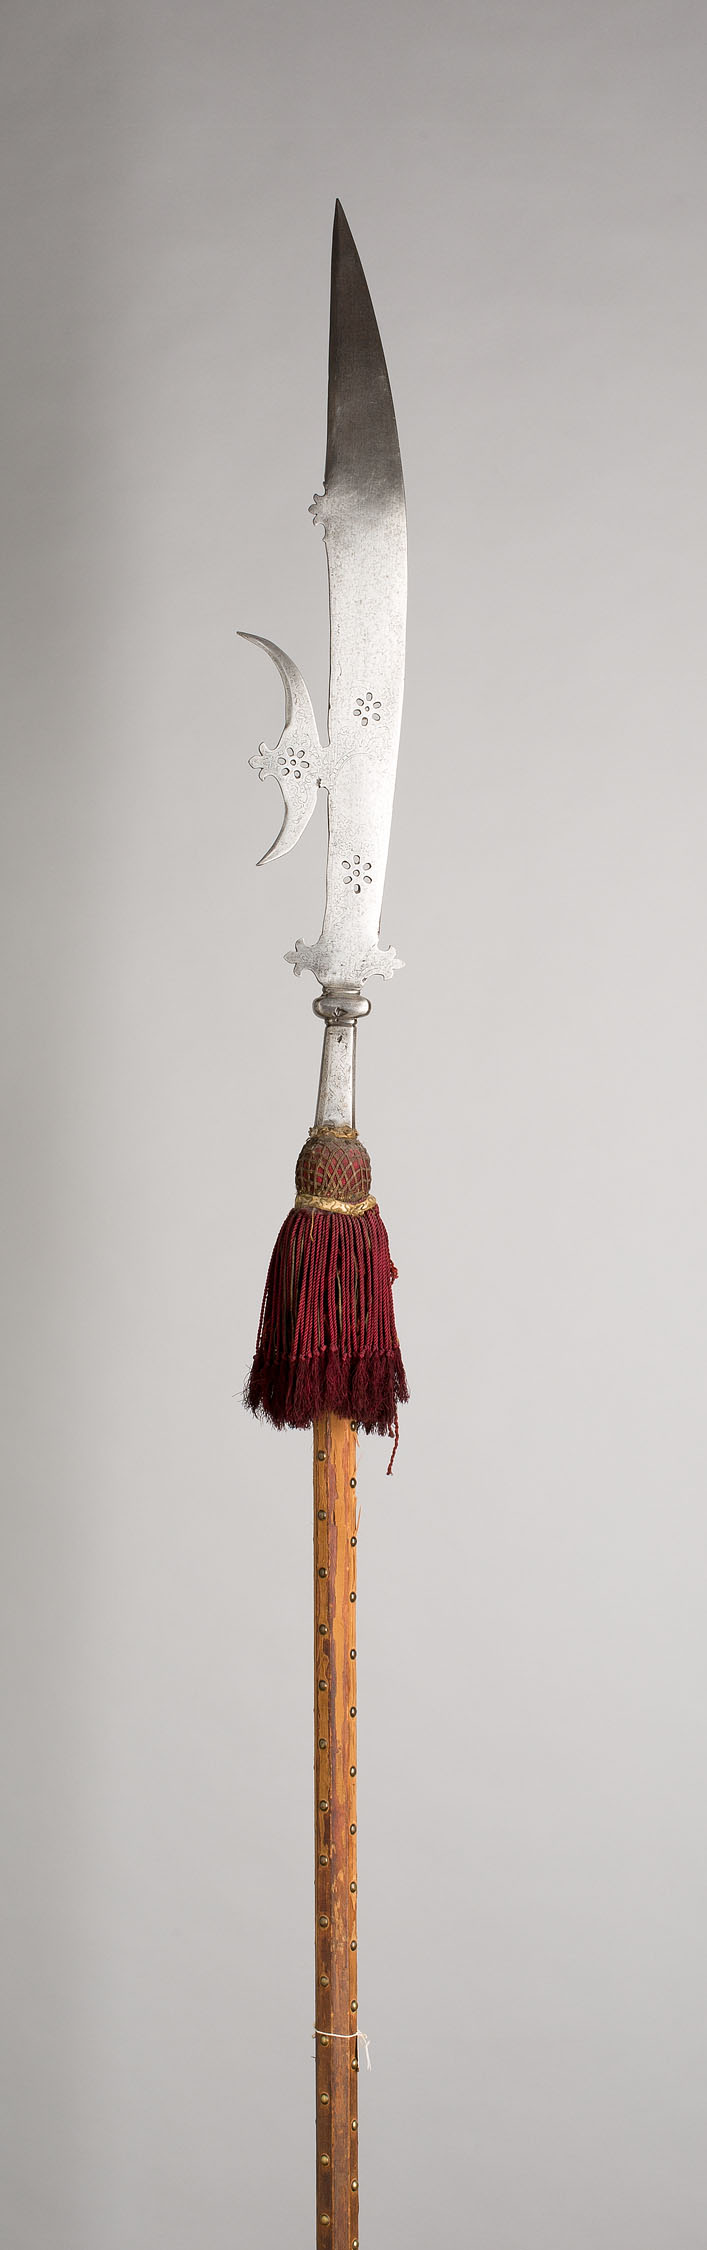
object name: Arms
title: Ceremonial Glaive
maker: Italian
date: 1600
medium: Steel, wood (pine), velvet, brass, and gold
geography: Italy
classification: edged weapon-staff; arms; arms and armor